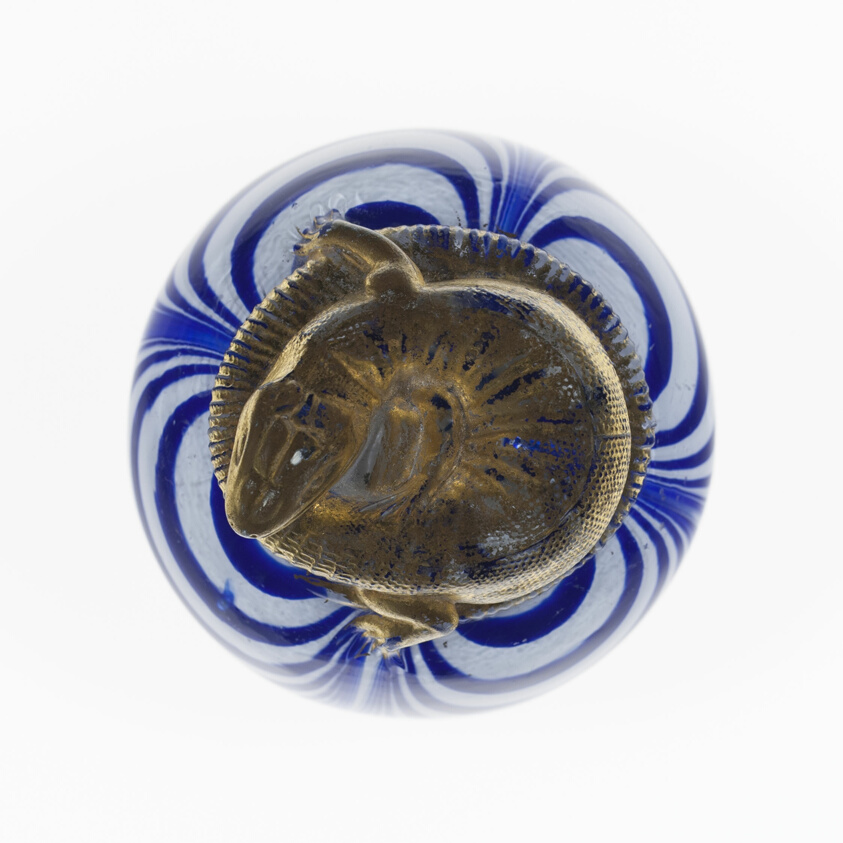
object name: Glass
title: Paperweight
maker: Saint-Louis Glassworks (Cristalleries de Saint-Louis); Lorraine, France, founded 1586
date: c. 1845–1860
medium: Glass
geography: Saint-Louis-lès-Bitche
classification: paperweight; glass